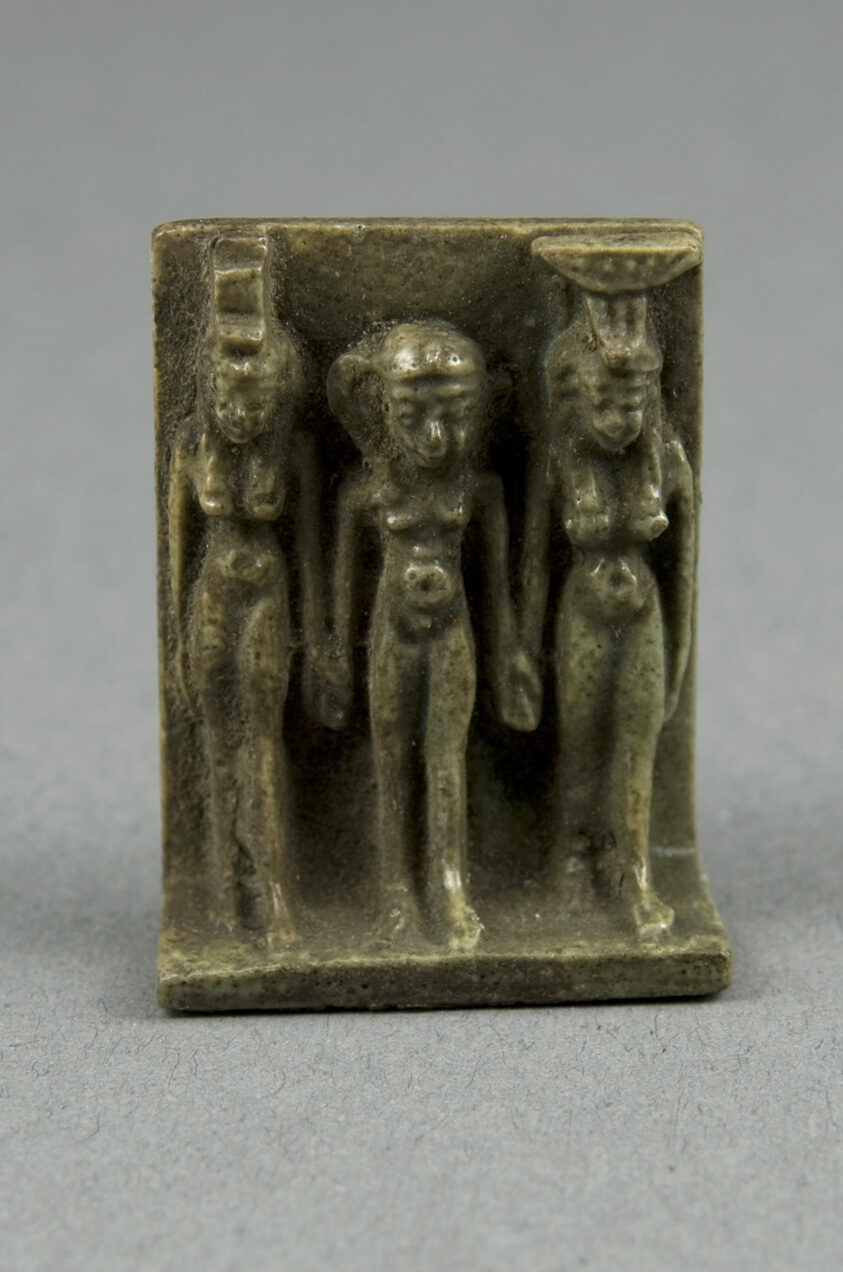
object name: Costume and Accessories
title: Amulet of the Goddesses Isis and Nephthys with Horus Standing Between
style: third intermediate period, egyptian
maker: Egyptian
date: Third Intermediate Period, Dynasty 21–25 (1070–656 BCE)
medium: Ceramic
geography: Egypt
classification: amulet; jewelry; ceramics; ancient art; costume